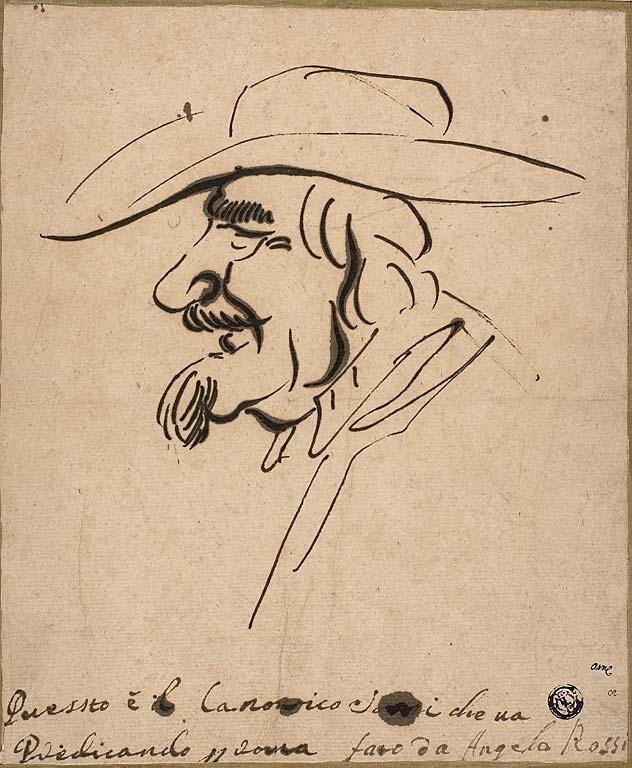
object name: Drawing and Watercolor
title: Caricature of Canon Sorri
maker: Angelo de Rossi (Italian, 1671-1715)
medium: Pen and brown ink on buff laid paper, laid down on ivory laid card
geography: Italy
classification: pen and ink drawings; drawings (visual works); prints and drawing